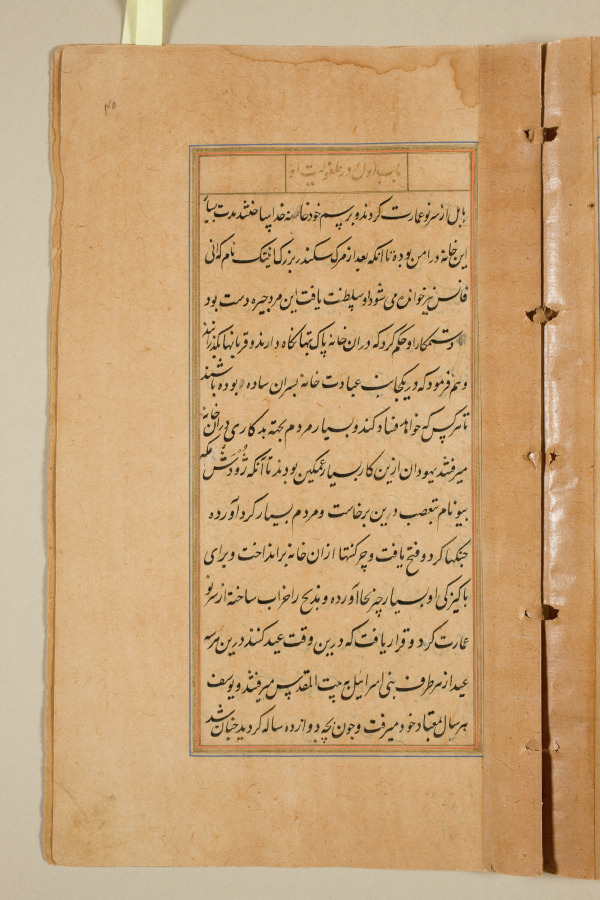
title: Text page from a Mirror of Holiness (Mir’at al-quds) of Father Jerome Xavier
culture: Mughal India, Allahabad, made for Prince Salim (1569–1627)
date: 1602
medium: Ink and gold on paper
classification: Manuscript